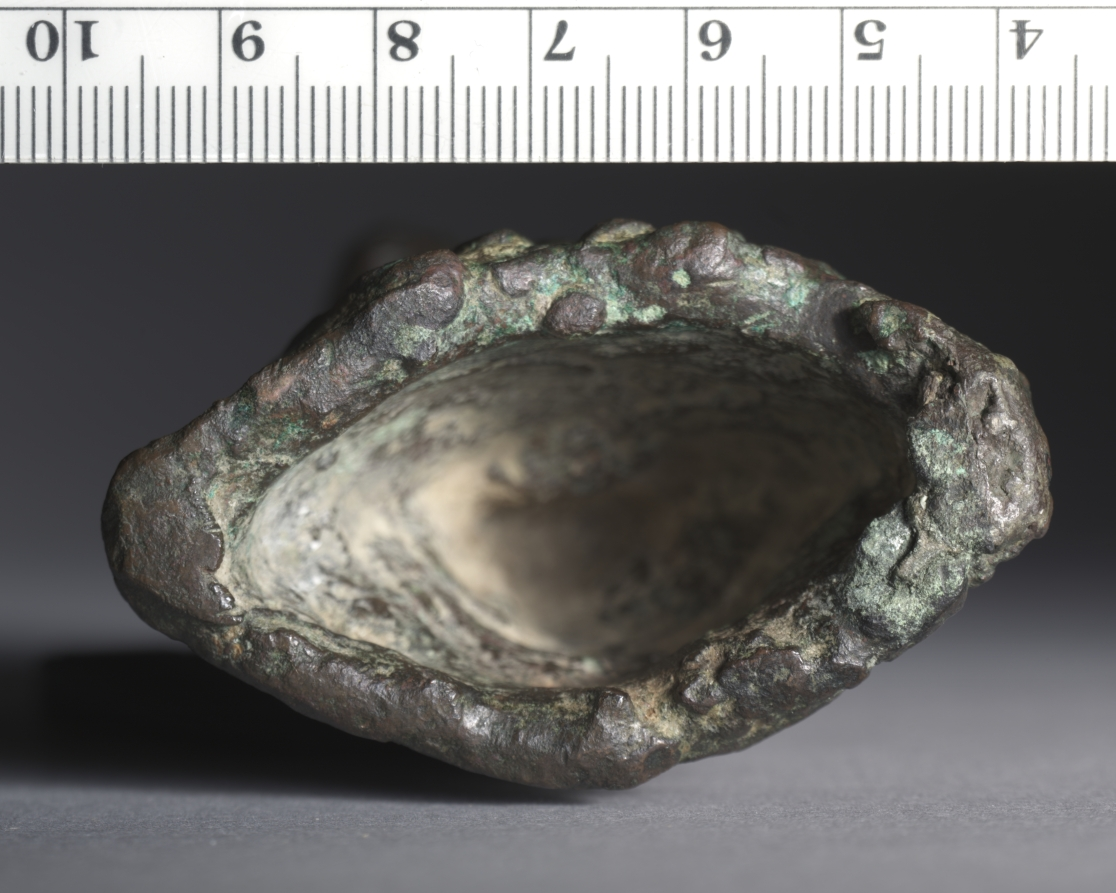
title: Female Worshiper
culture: Crete, Minoan, middle Minoan III–late Minoan I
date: c. 1600–1500 BCE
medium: bronze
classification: Sculpture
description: This extremely rare Minoan bronze statuette represents a girl worshiping a deity. It was probably left as a dedication to a divinity. She wears a flounced skirt over a sleeved robe open at the front. The figure shows a remarkable degree of detail, including looped earrings, bracelets, and a necklace. Her shaved hairstyle, not found on any other Minoan bronze statuette, matches that of painted figures in roughly contemporary frescoes uncovered on the island of Thera, north of Crete. Its excellent condition, rarity, fine detail, and balanced proportions set it apart from other statuettes of its type to have survived.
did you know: The shaved head with prominent locks of hair indicates that this female votive figure is an adolescent.